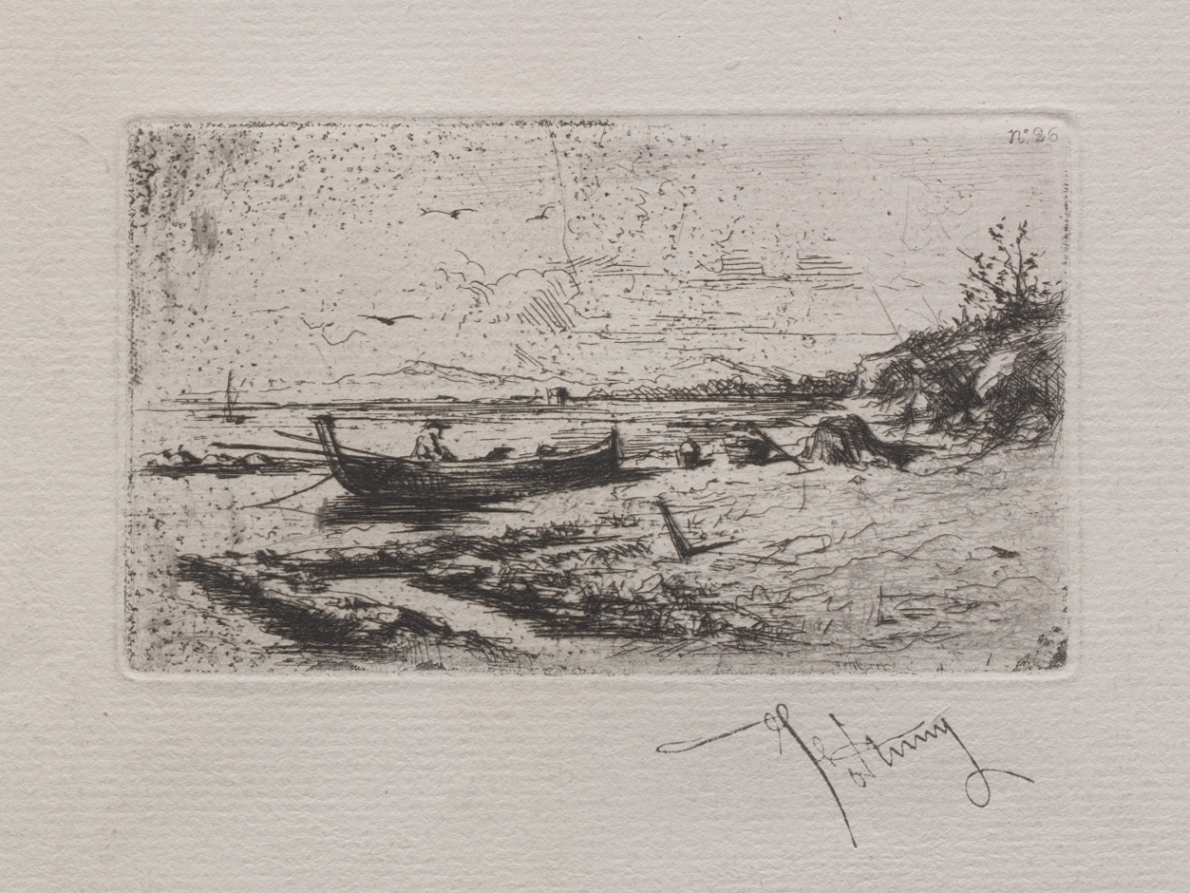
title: Untitled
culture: Spain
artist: Mariano Fortuny (Spanish, 1838–1874)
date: c. 1860–70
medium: etching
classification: Print